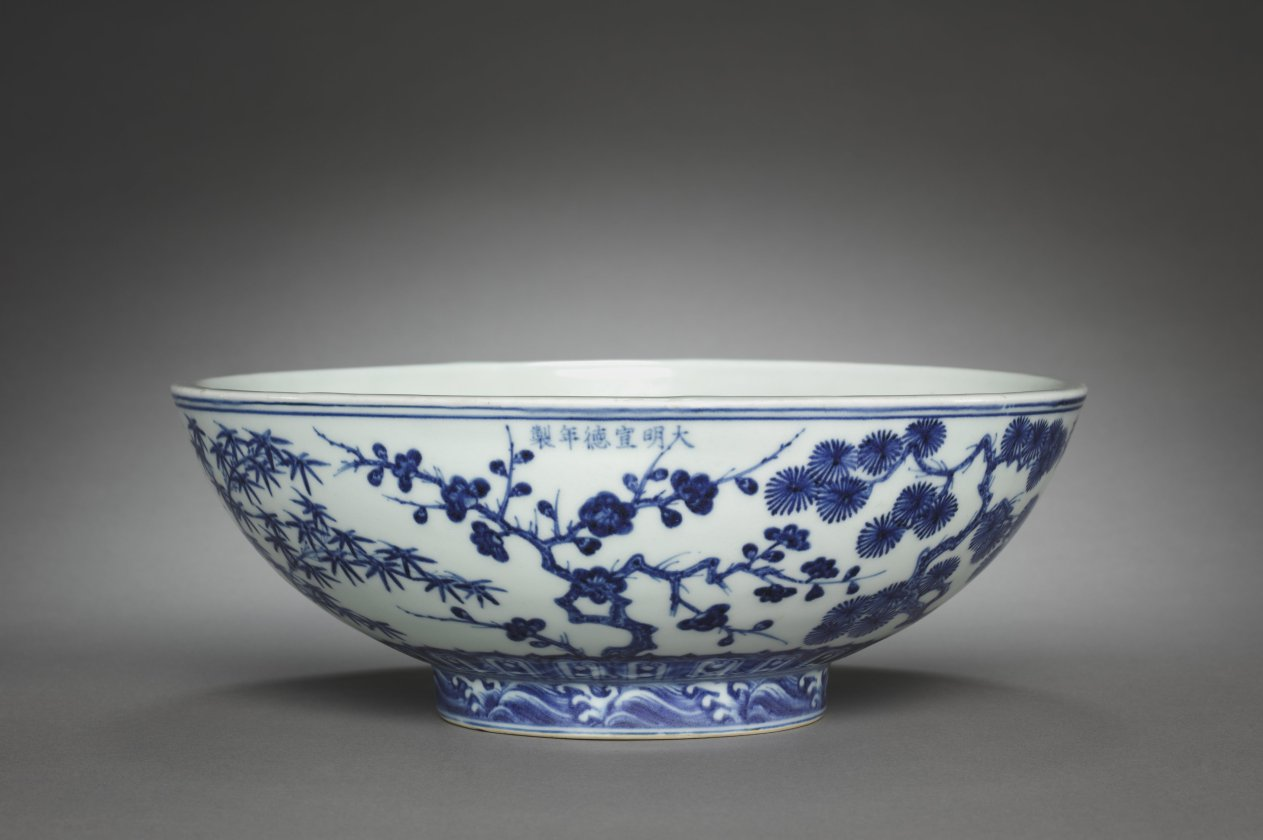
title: Bowl with Decoration of the "Three Friends"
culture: China, Jiangxi province, Jingdezhen, Ming dynasty (1368-1644), Xuande mark and reign (1426-1435)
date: 1426–35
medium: porcelain with underglaze blue decoration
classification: Ceramic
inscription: 大明宣德年製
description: Pine, bamboo, and plum blossom are known as the “Three Friends” of winter as metaphors of the scholar-gentleman’s ideal of integrity, endurance, loftiness, and purity.